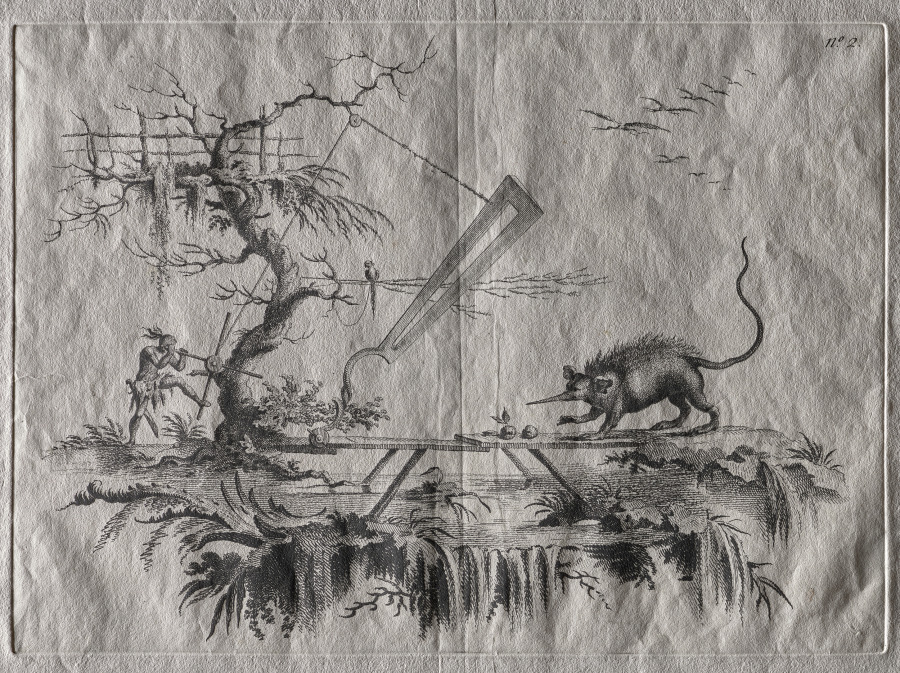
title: A new device to cleave wild beasts from Head to Tail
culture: Italy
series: Suite of the Most Notable Things Seen by John Wilkins Erudite English Bishop during His Famous Voyage from the Earth to the Moon … dedicated to Sir William Hamilton ambassador to the Court of Naples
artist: Filippo Morghen (Italian, 1730–after 1807)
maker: possibly after Jean-Pierre-Louis-Laurent Hoüel (French, 1735–1813)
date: about 1769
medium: etching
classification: Print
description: Filippo Morghen’s set of 10 etchings is outstanding among visual narratives of imaginary voyages to the moon, both visual and literary, that intrigued 18th-century European audiences. A title page and nine plates depict the imagined lives and economy of moon dwellers. These include modes of transport such as large birds and sailboats propelled by giant bellows, enormous scissors for capturing wild beasts (including an oversized rat), and the use of giant pumpkins as fishing boats and as dwellings. Representations of the moon dwellers are based on inaccurate and imaginary European interpretations of Asian, Ottoman, and Native American cultures—called chinoiserie and turquerie—that permeated the decorative and visual arts of the period.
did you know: Morghen based this print series on three books dedicated to moon exploration, including Bishop Francis Godwin’s The Man in the Moone (1640).